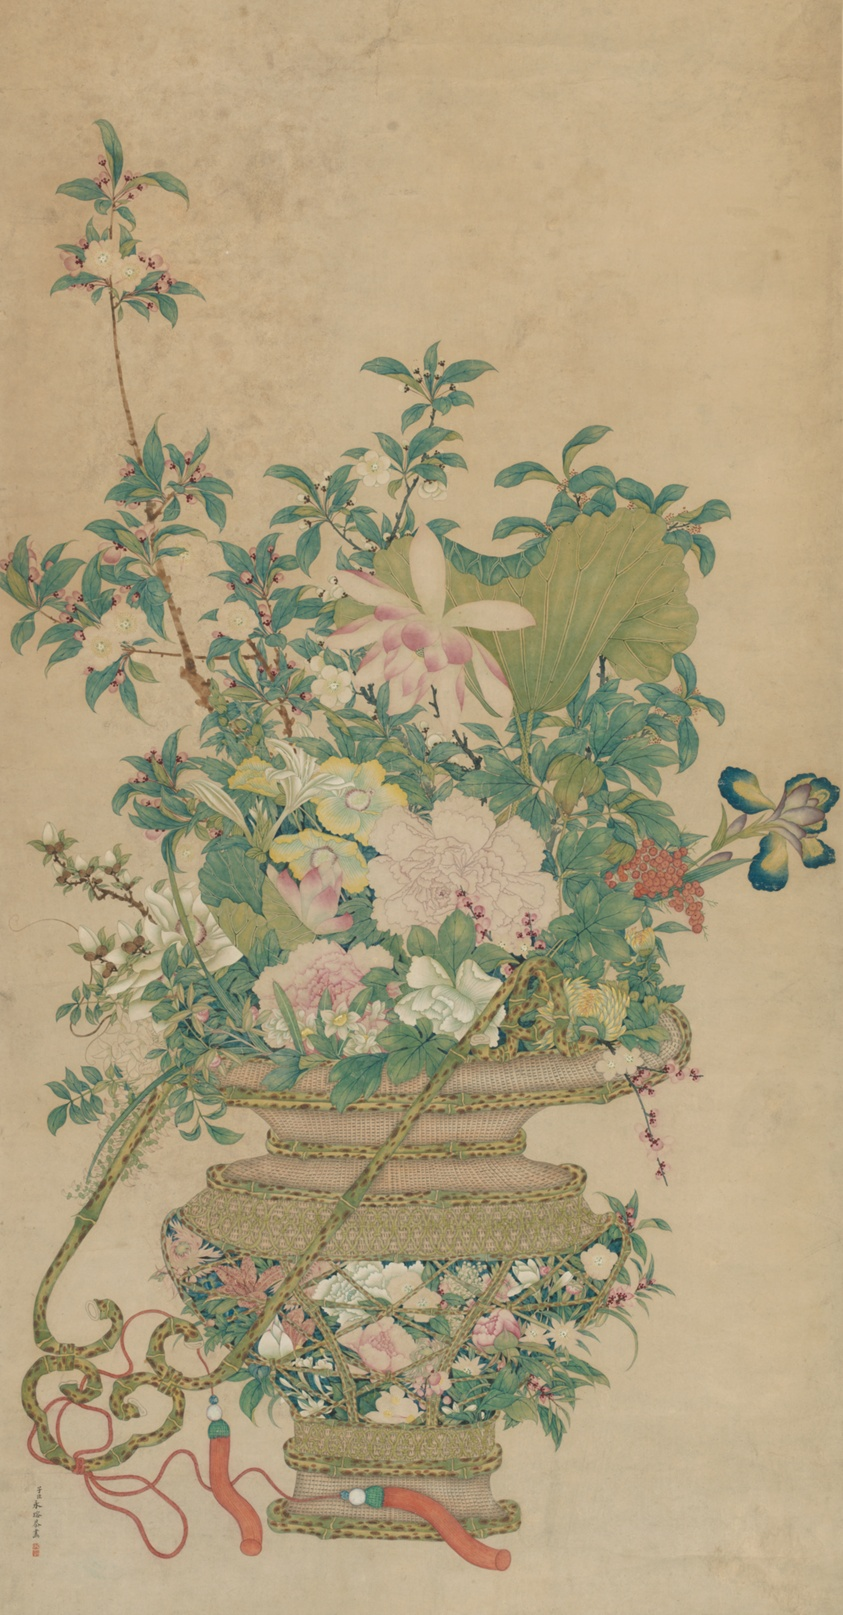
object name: Painting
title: Flowers of the Four Seasons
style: Chinese (culture or style)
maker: Artist unknown (spurious attribution to Prince Yongrong); Chinese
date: Qing dynasty (1644–1911), 18th/19th century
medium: Hanging scroll; ink and colors on paper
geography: China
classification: hanging scroll; painting; asian art